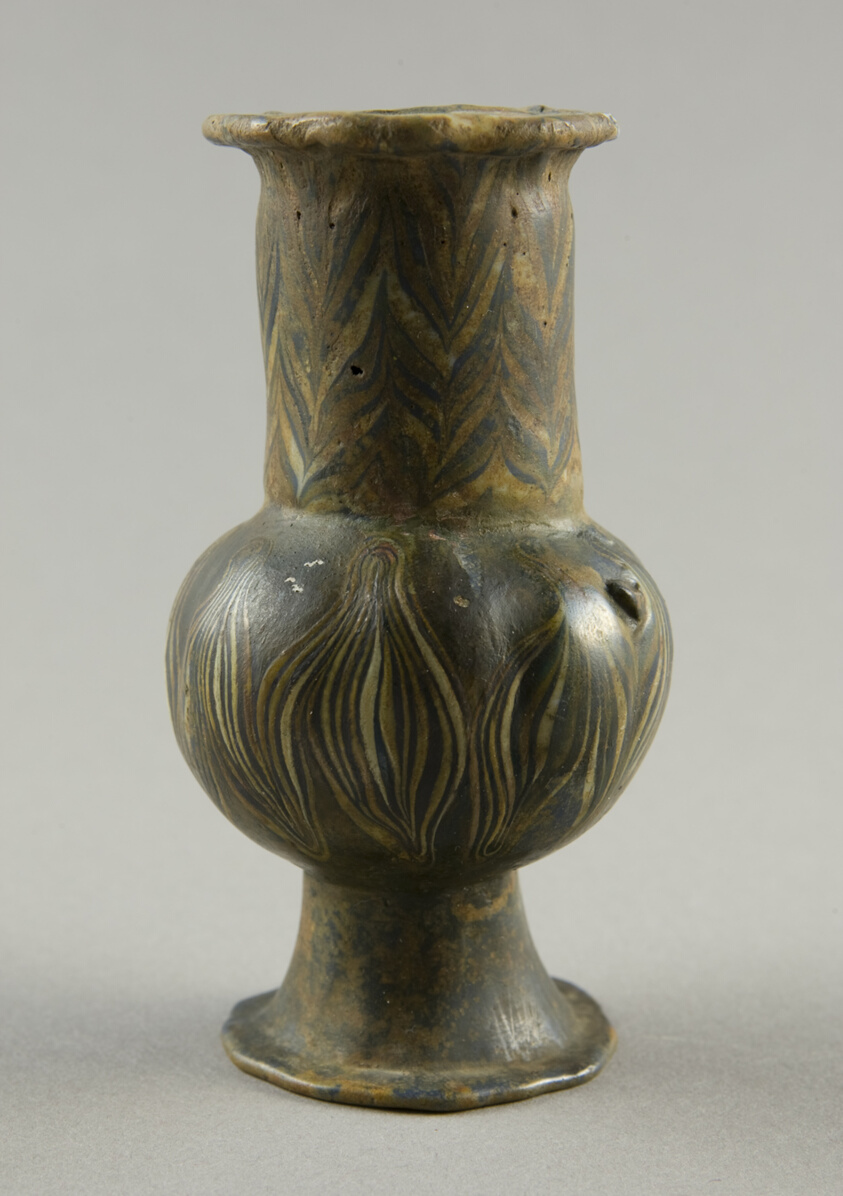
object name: Vessel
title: Vase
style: egyptian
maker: Egyptian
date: New Kingdom, Dynasty 18 (about 1550-1295 BCE)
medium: Glass, core-formed technique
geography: Egypt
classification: glass; vessel; ancient art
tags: vase